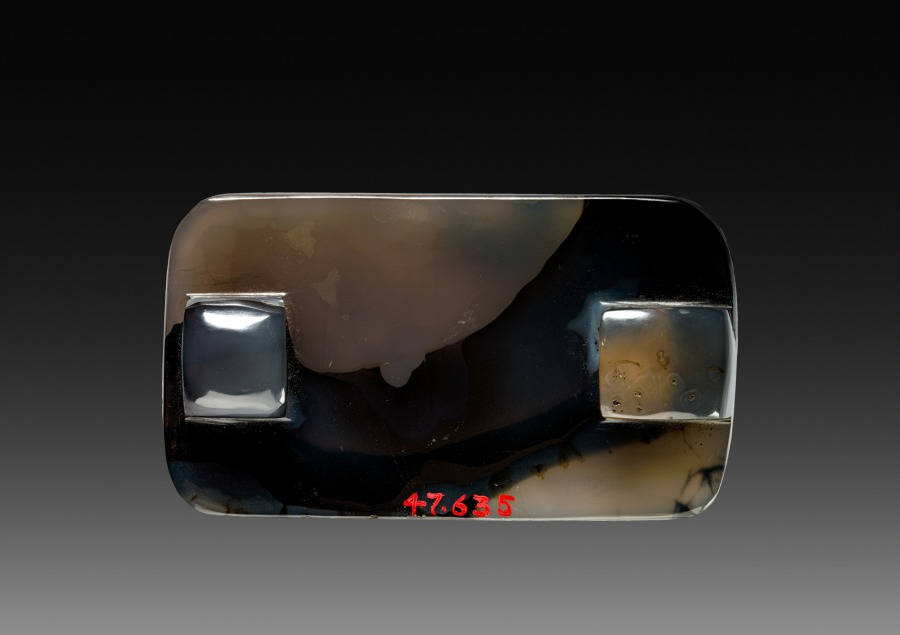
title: Buckle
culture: China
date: 1900s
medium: agate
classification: Jewelry